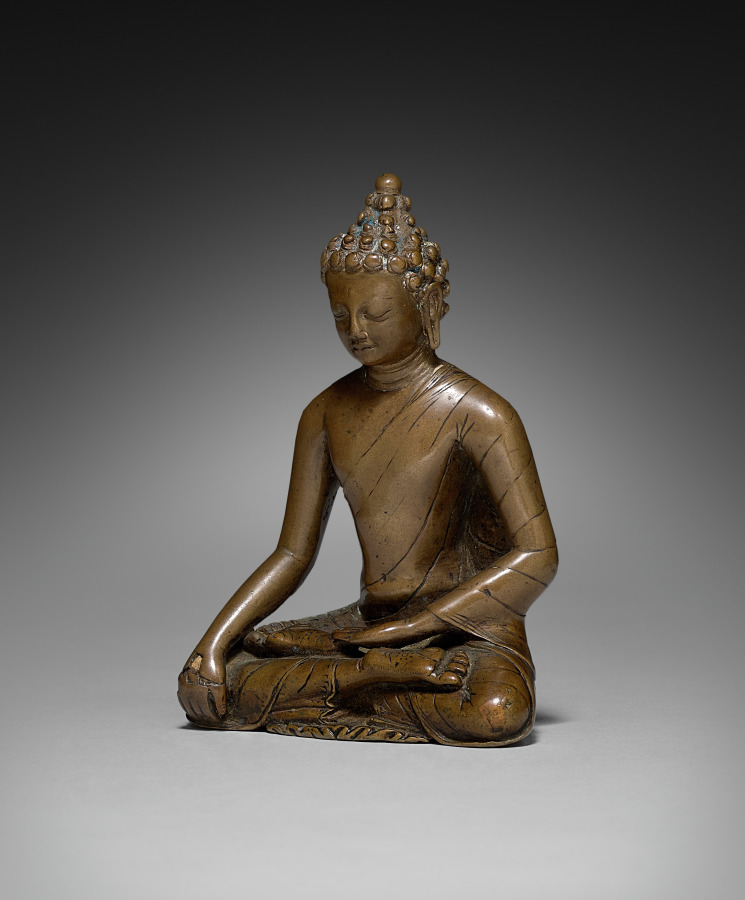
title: Seated Buddha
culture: India, Bengal(?), Pala period, 9th century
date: 800s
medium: bronze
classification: Sculpture